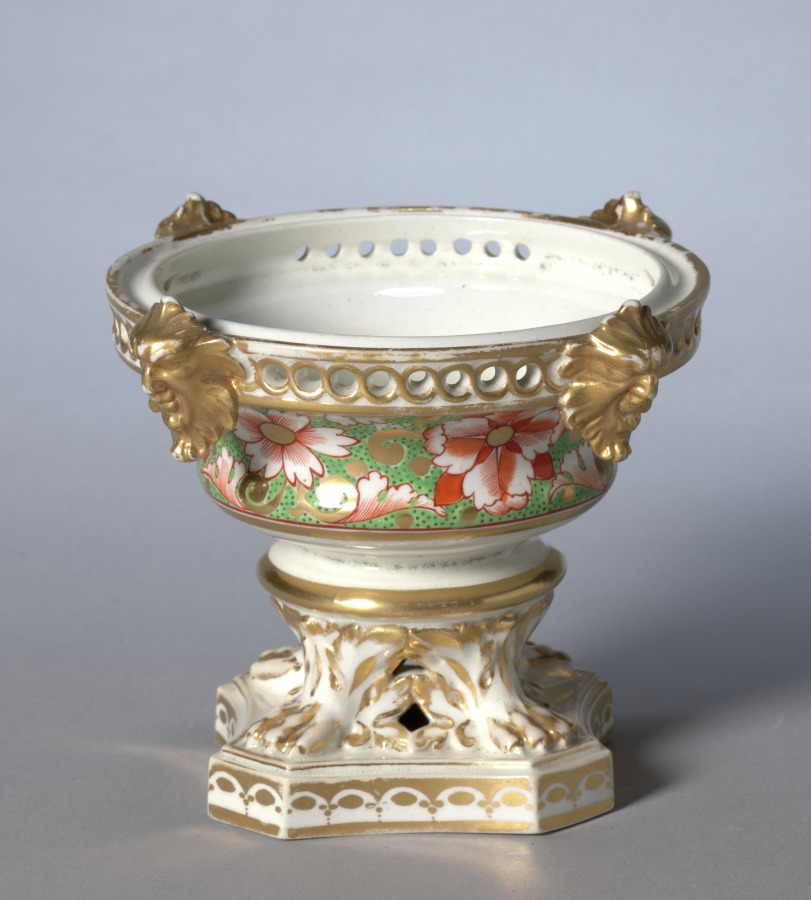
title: Potpourri Vase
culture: England, Derby, 19th century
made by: Derby (Crown Derby Period) (British)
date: c. 1810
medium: porcelain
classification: Ceramic